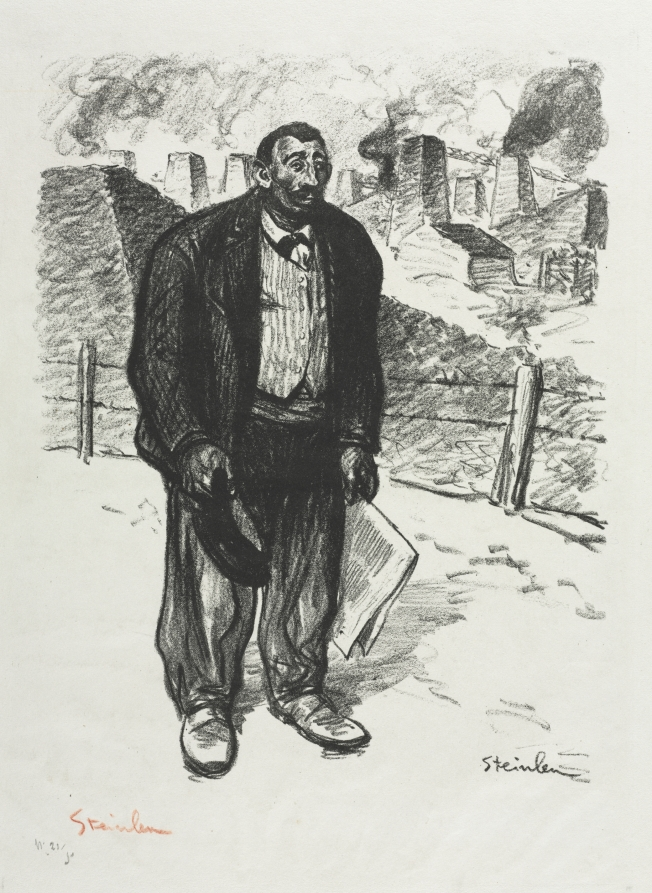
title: L'Honnête ouvrier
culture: Switzerland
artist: Théophile Alexandre Steinlen (Swiss, 1859–1923)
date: 1899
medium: lithograph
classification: Print